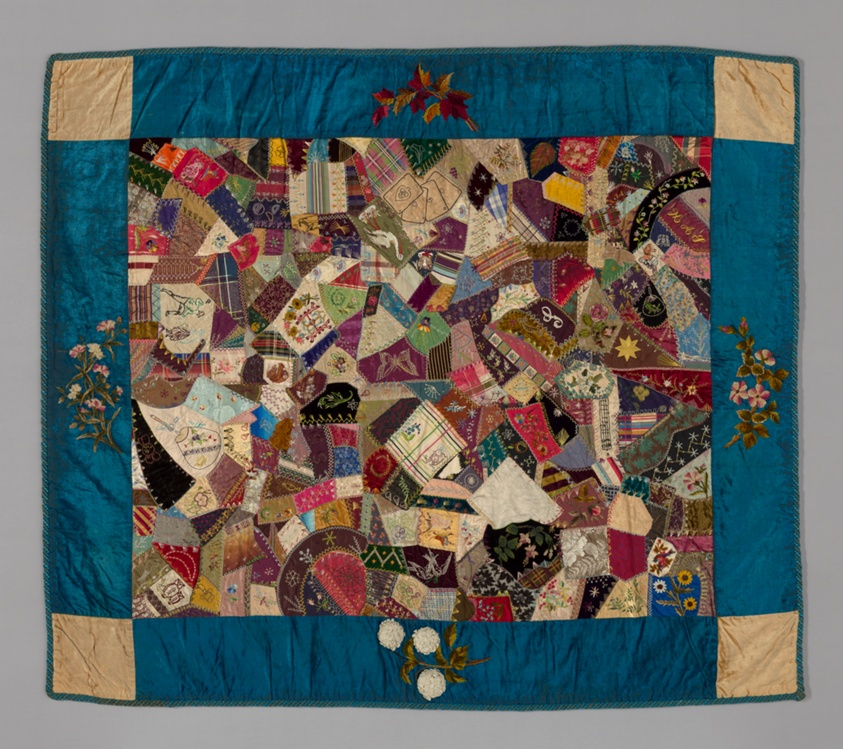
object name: Textile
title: Parlor Throw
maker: American, possibly Illinois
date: c. 1890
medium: Pieced, embroidered and painted “crazy” quilt; dyed and printed silk plain, satin, pile and patterned weave fabrics and ribbons; silk and metallic embroidery threads; paint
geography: Illinois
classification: needlework - quilt; textile